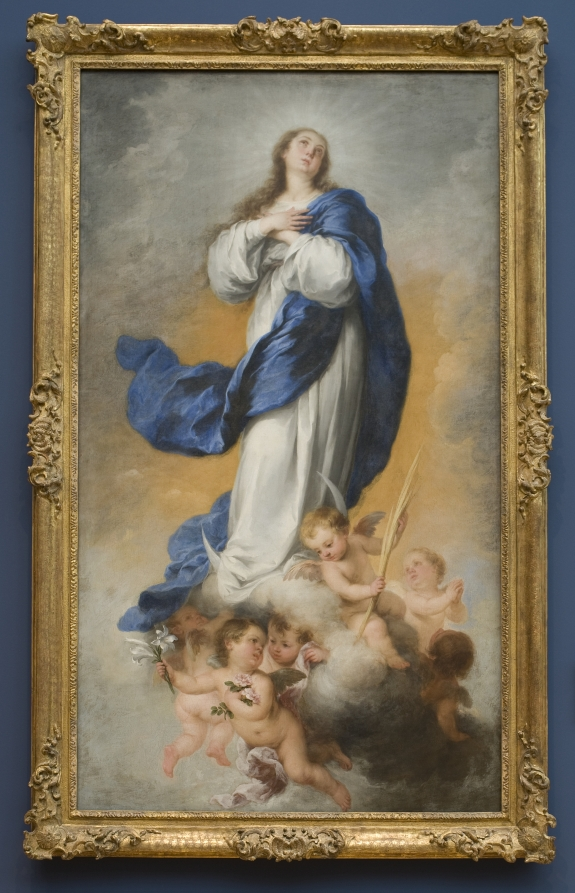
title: The Immaculate Conception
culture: Spain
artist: Bartolomé Esteban Murillo (Spanish, 1617–1682)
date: c. 1680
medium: oil on canvas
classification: Painting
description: The doctrine of the Immaculate Conception maintains that the Virgin Mary was conceived free from sin, therefore ready to be the pure vessel for Christ’s birth. The Immaculate Conception enjoyed intense devotion in Spain during the 1600s, although it was only accepted as official doctrine in 1854. The abstract subject required artists to develop appropriate imagery. The crescent moon, for example, comes from the New Testament vision of Saint John the Evangelist (Revelation 12:1) of “a woman clothed with the sun, with the moon under her feet.”